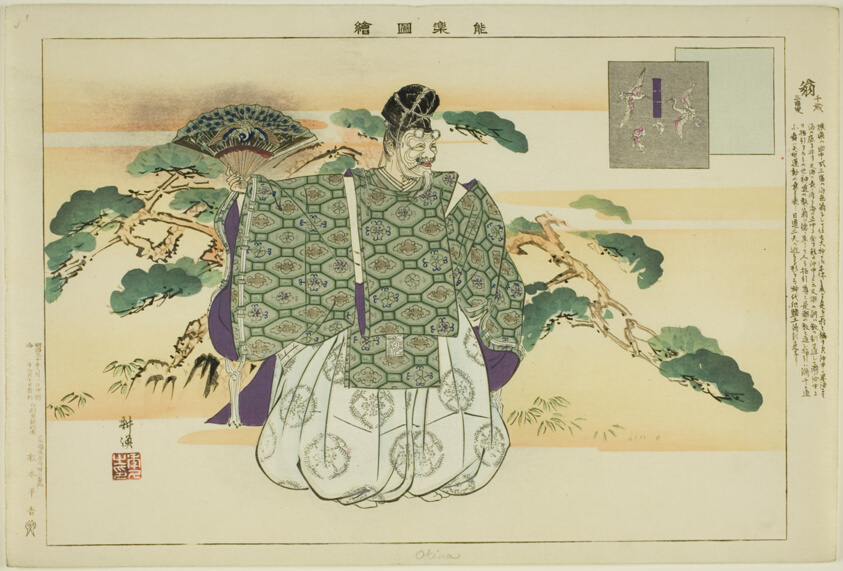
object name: Print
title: Okina, from the series "Pictures of No Performances (Nogaku Zue)"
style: Japanese (culture or style)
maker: Tsukioka Kogyo; Japanese, 1869-1927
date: 1898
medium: Color woodblock print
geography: Japan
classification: woodblock print; print; asian art